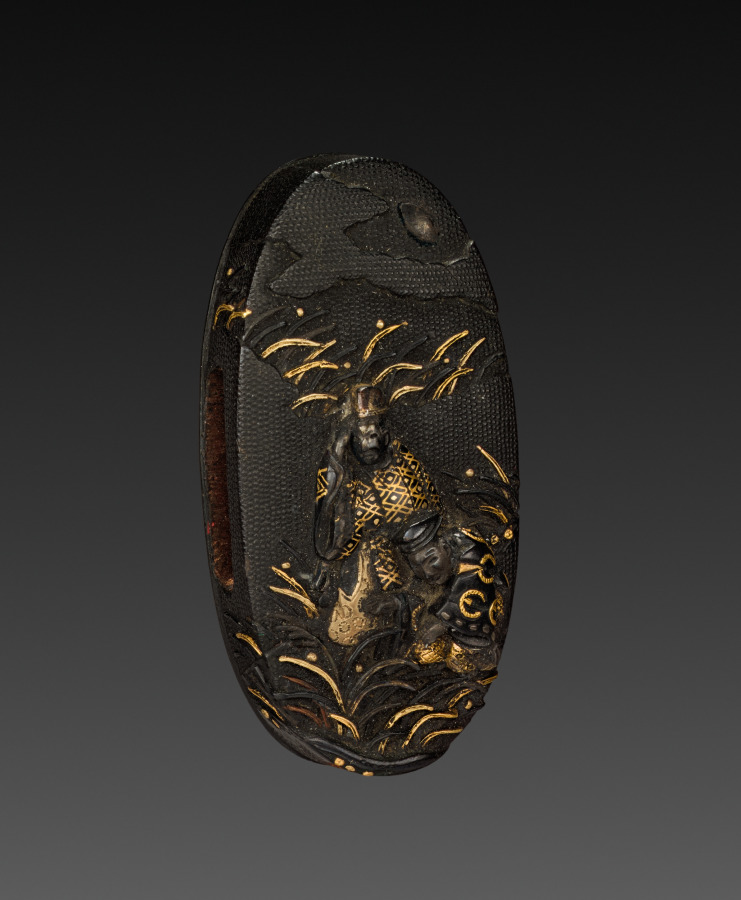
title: Sword-Hilt Pommel (Kashira)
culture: Japan, Edo period (1615–1868)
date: 1700–1850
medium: shakudo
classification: Arms and Armor